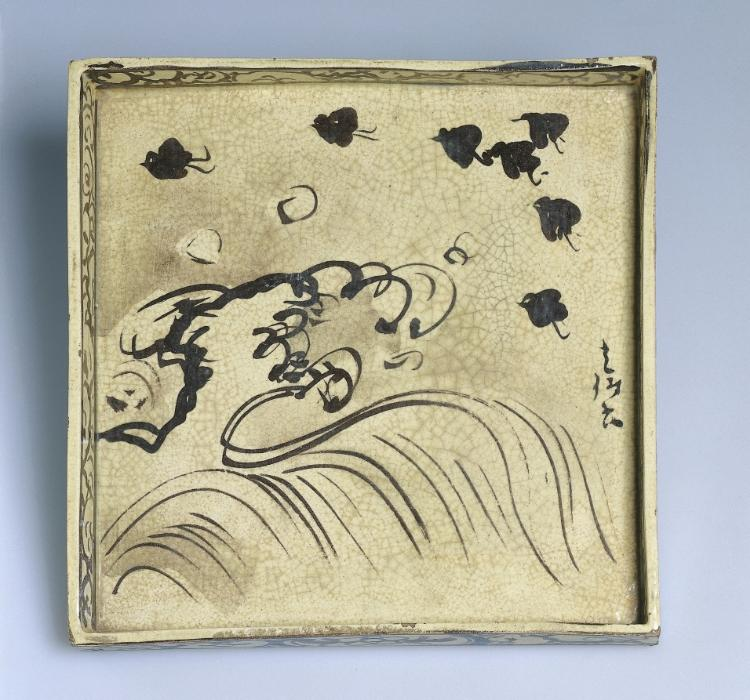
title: Square Dish with Design of Plovers over Waves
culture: Japan, Edo period (1615–1868)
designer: Ogata Kōrin (Japanese, 1658–1716)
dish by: Ogata Kenzan (Japanese, 1663–1743)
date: c. 1700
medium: Glazed stoneware with iron oxide underglaze slip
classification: Ceramic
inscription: design painted by Korin and signed "Jakumei Korin Gaku"; inner and outer faces of four walls probably painted by an assistant at the kiln, underside of dish signed, "Kenzan."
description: The Ogata brothers Kōrin and Kenzan often collaborated on ceramics. This dish is one of a set used for serving tea cakes. Kenzan shaped the dish, after which Kōrin drew the iron oxide design of plovers, a type of shorebird, flying over waves. Kenzan then covered the object with a clear glaze and fired it. Kōrin placed his signature next to his design, while Kenzan signed the back.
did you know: The design of plovers flying over waves derives from Heian period (900s–1100s) literature and later lacquerware designs.